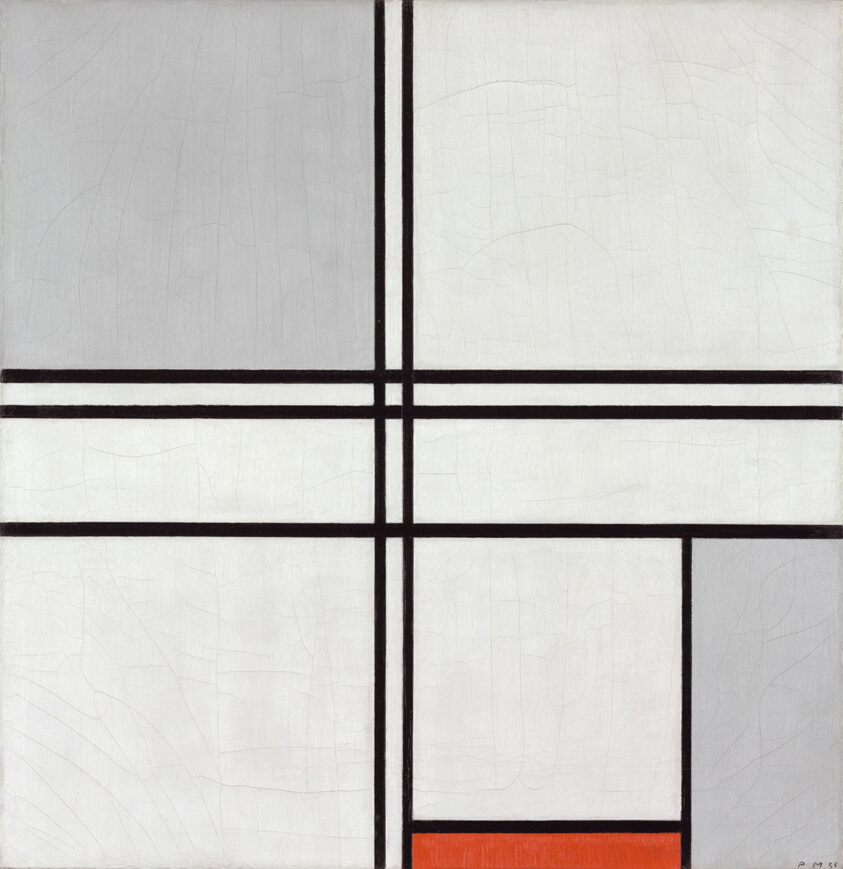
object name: Painting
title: Composition (No. 1) Gray-Red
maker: Piet Mondrian (Dutch, 1872–1944)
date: 1935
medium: Oil on canvas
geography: Netherlands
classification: painting; modern and contemporary art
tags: geometric, red (color), white (color), black (color), grids, lines